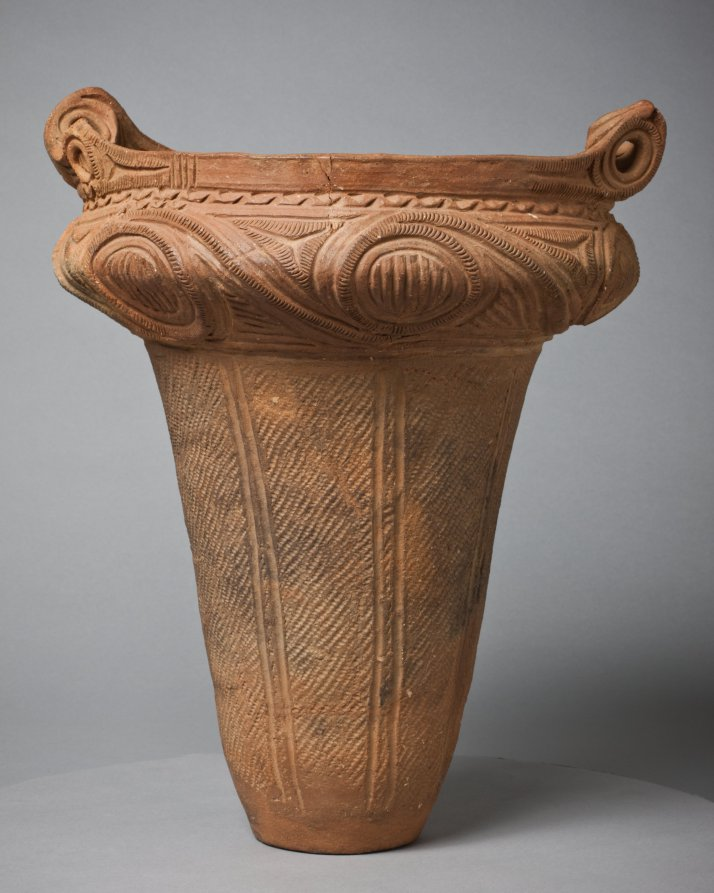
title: Urn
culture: Japan, Jōmon period (c. 10,500–300 BCE)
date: c. 2000 BCE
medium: earthenware, terracotta, impressed and incised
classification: Ceramic